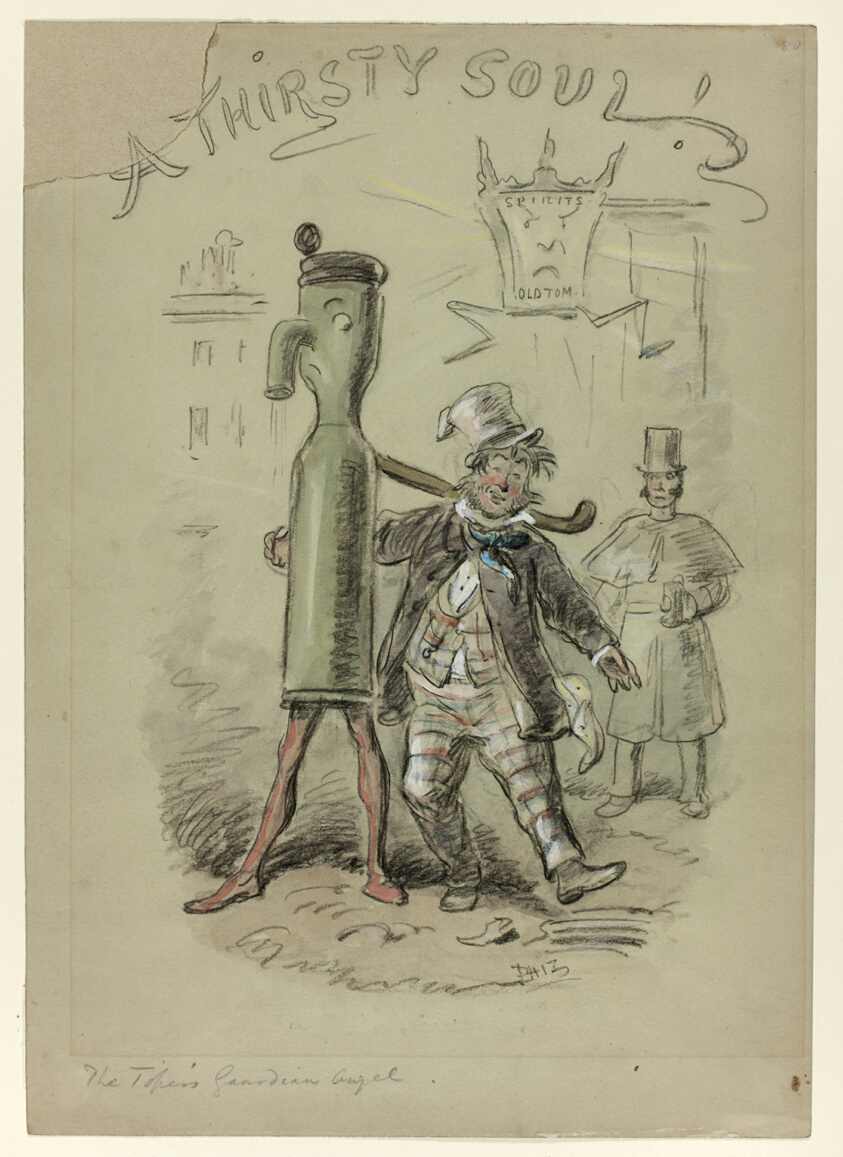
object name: Drawing and Watercolor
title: A Thirsty Soul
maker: Hablot Knight Browne (English, 1815-1882)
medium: Watercolor and charcoal, with touches of gouache, on grayish-green wove paper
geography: England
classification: watercolor; drawings (visual works); prints and drawing